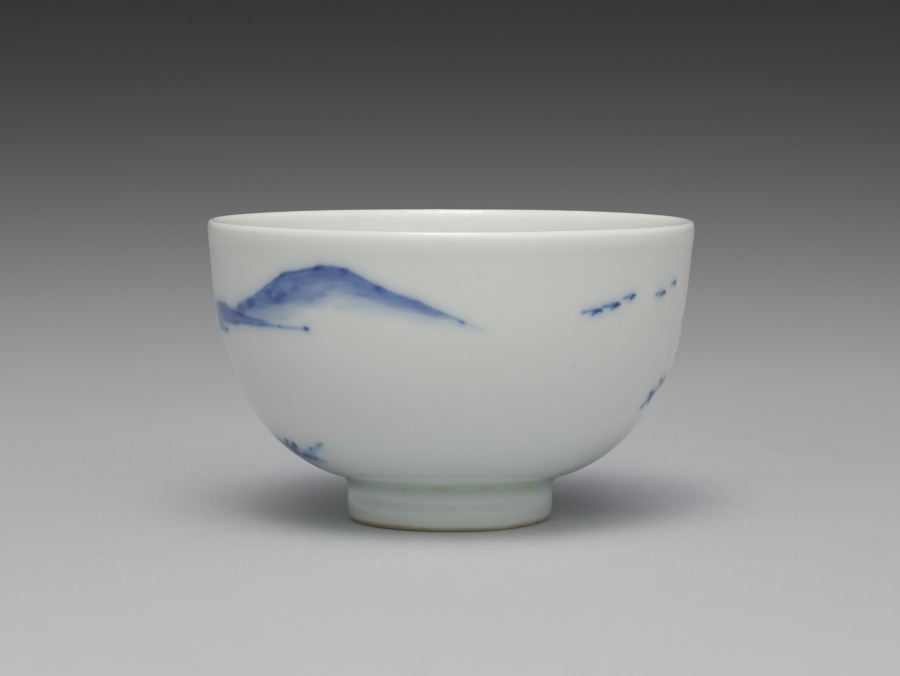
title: Teacup from Tea Set with Chinese Landscape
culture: Japan, Meiji period (1868–1912)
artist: Seifū Yohei III (Japanese, 1851–1914)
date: 1893–1914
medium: Porcelain with underglaze blue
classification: Ceramic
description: The theme of this sencha tea set is the Chinese scholar-recluse in an idyllic landscape. Each of the five teacups has a landscape with an architectural structure and some human activity. This tea set has a side-handled pot called a kyūsu, used for steeping, straining, and serving tea. Unlike some others, this set also has a yuzamashi, a container used to cool boiled water to just the right temperature for the best flavor when steeping. Seifū Yohei III’s painting teacher, Tanomura Chokunyū (1814–1907), made a visual record of famous sencha events that shows how these kinds of porcelains fit with objects such as a stove and kettle to form a complete set of utensils for tea preparation, and with ensembles of decorative objects meant to inspire creativity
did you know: This cup shows a man rowing a little skiff, which disturbs the otherwise still water. Behind him in the distance is an open-air pavilion. He is making his way toward a pair of figures playing a board game, much like the scene on the teapot. Down the hill from them is a residence; beyond this, a flock of geese approaches through the sky.